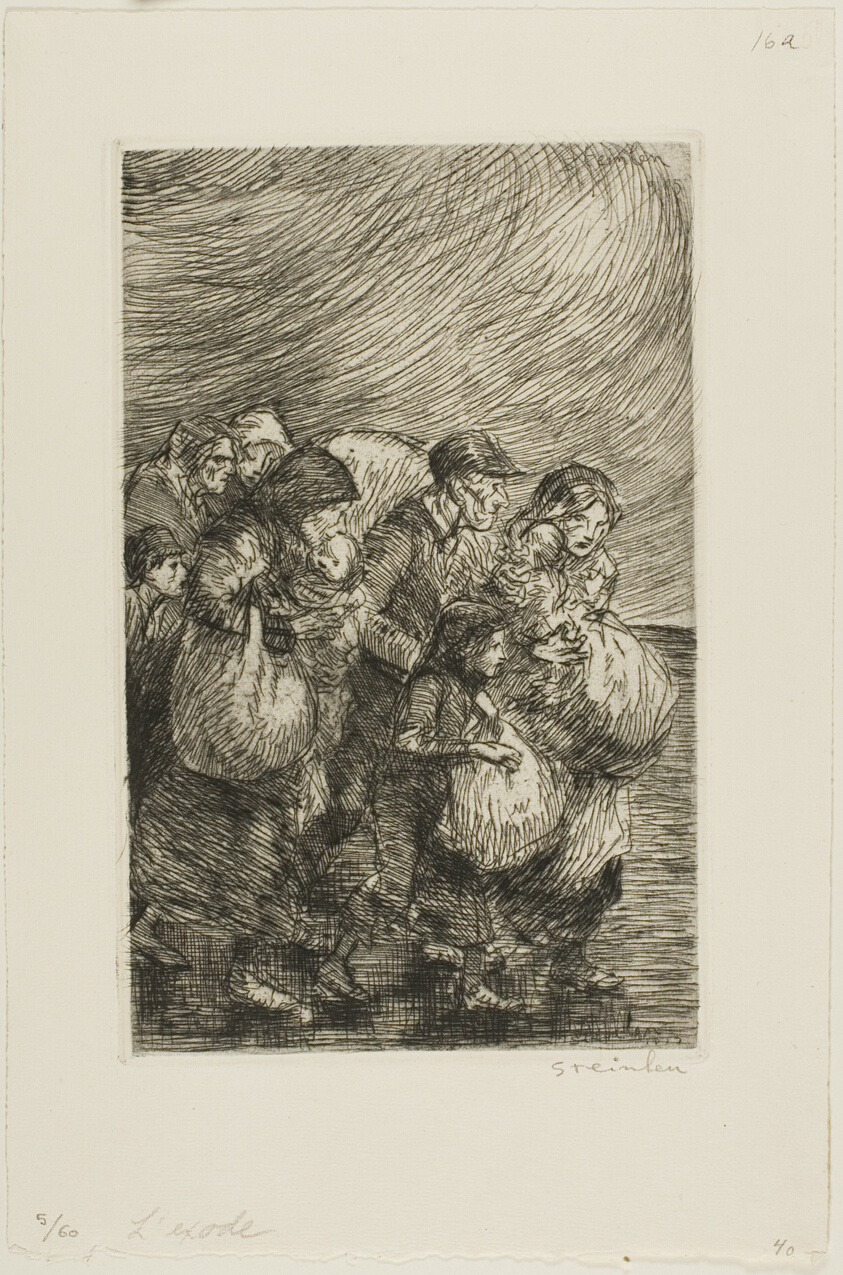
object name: Print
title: Evacuees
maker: Théophile-Alexandre Steinlen (French, born Switzerland, 1859-1923); printed by Eugène Delâtre (French, 1864-1938); published by d'Alignan, Paris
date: September 1915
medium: Etching, aquatint and drypoint in black on ivory laid paper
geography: France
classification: etching; print; prints and drawing